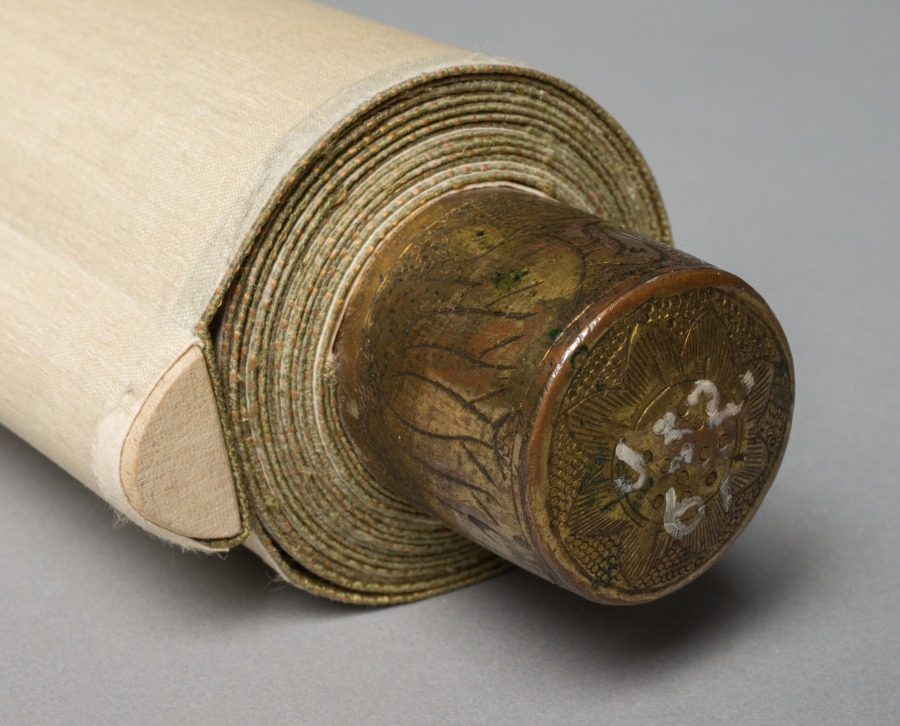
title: A High-ranking Noble in Priest's Robe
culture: Japan, Muromachi period (1392–1573)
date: 1392–1573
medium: hanging scroll; ink and color on silk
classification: Painting